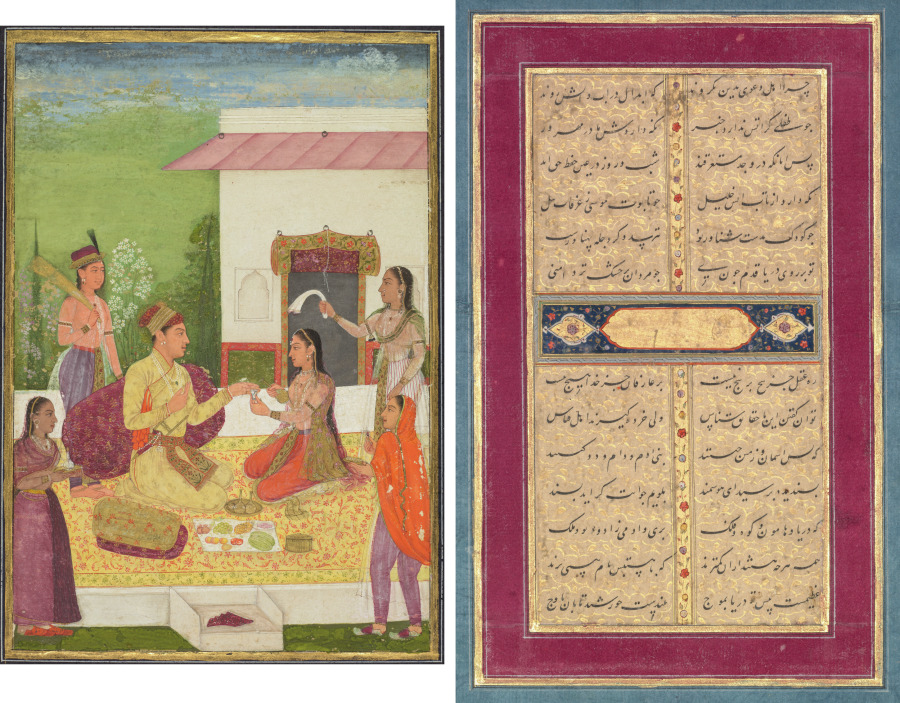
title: A prince conversing with a woman while taking refreshments on a terrace (recto); Calligraphy (verso)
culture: Mughal India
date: c. 1710–20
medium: Gum tempera, ink, and gold on paper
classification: Painting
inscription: Verso: From a Bustan (Fragrant Herb Garden) of Sa‘di (Persian, 1210–1291). Persian text in nasta‘liq script: Why do the adherents of Idea to this not cleave—/ That only the Elect may go in water or in fire?/ As for the infant, uninformed of fire,/ Does not his mother guard him lovingly?/ Those, then, who’re drowned in ecstasy/ By night and day are in the very care of Truth:/ He guards the Friend against the fire’s heat/ As Moses’s crib against the whirlpools of the Nile;/ When an infant’s in a swimmer’s arms/ He knows no fear, broad though the Tigris be;/ But how shall you step on the ocean’s face/ As do real men, when even on dry land your skirt is wet?/ The way of the intellect is all twists and turns,/ But the concern of the gnostics is for God alone!/ This can be said to those who recognize realities,/ Though adherents of analogy may carp thereat and say:/ “What, then, is heaven, and what earth besides?/ Who are the sons of Adam, and the beasts both wild and tame?”/ A proper thing you’ve asked, O prudent one!/ I’ll tell you—if you find the answer proper:/ The plain and the ocean, the mountain and the sky,/ Pari and manchild, demon and angel—/ All, whatsoever they be, are less than That/ By virtue of Whose being they utter being’s name!/ Monstrous before you, with its waves, lies the ocean;/ High is the sun, all ablaze at the zenith; (after Wickens 1974, 113)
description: The carpet turns a terrace into a space where a prince can enjoy the company of women over wine and fruits. A covered box on the carpet contains aromatic betel nut packets for pleasurable chewing. He has removed his shoes, which are left on the marble step. A princess pours liquor from a golden bottle into a tiny blue-and-white ceramic cup. The pair’s royal status is indicated by the attendants who hold the white cloth and peacock-feather whisks. Two other women bring jewels and a vial of perfume to be inspected and discussed by the royal connoisseurs.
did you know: The prince removed his shoes before joining the picnic on the carpeted terrace.